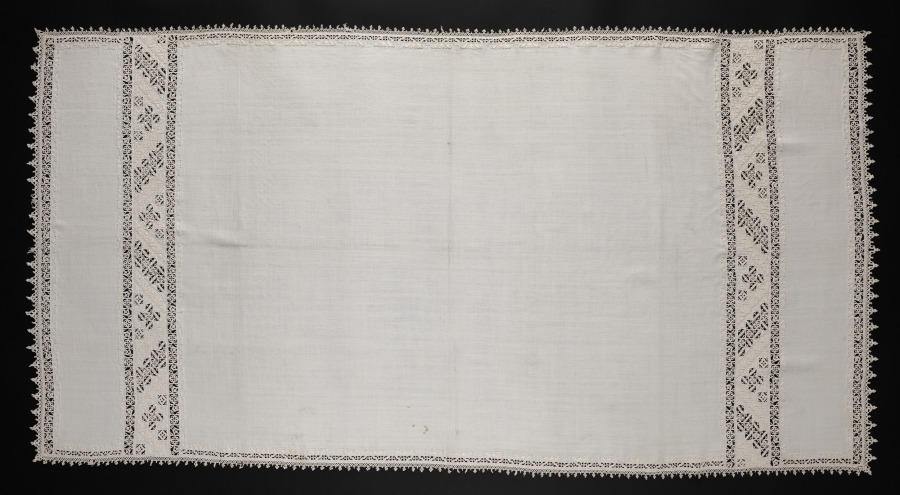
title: Lace Cloth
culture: Italy, Padua and Venice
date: 1500s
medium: Linen: needle lace (cutwork), bobbin lace, and embroidery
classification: Lace